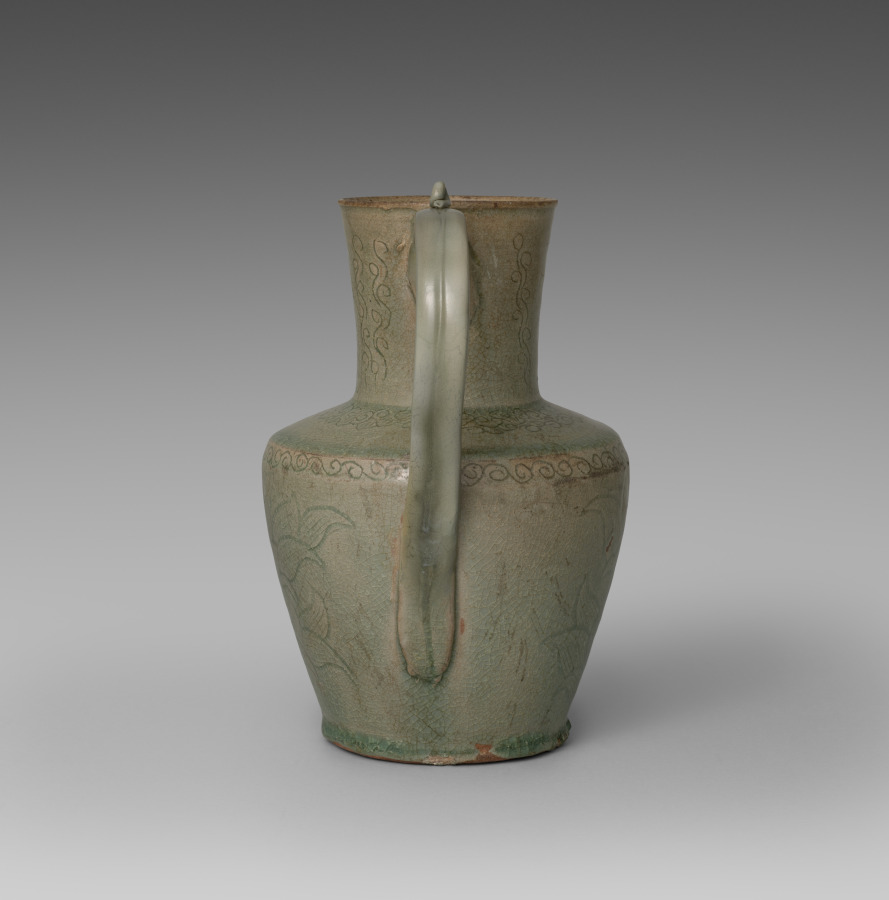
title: Wine Pot with Incised Lotus Design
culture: Korea, Goryeo dynasty (918–1392)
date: 918–1392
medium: celadon ware with incised and carved decoration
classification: Ceramic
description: As early as the seventh century, the practice of drinking tea and wine became an important part of elite culture in Korea. Elites of the Goryeo period commissioned a variety of types of utensils and vessels including this elegant wine pot with the incised image of lotus flowers, not only to make their drinking experience more exciting, but also to show their appreciation of nature.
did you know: A small loop on the handle was intended to secure the lid (now missing) on top of the pitcher through a cord or chain.